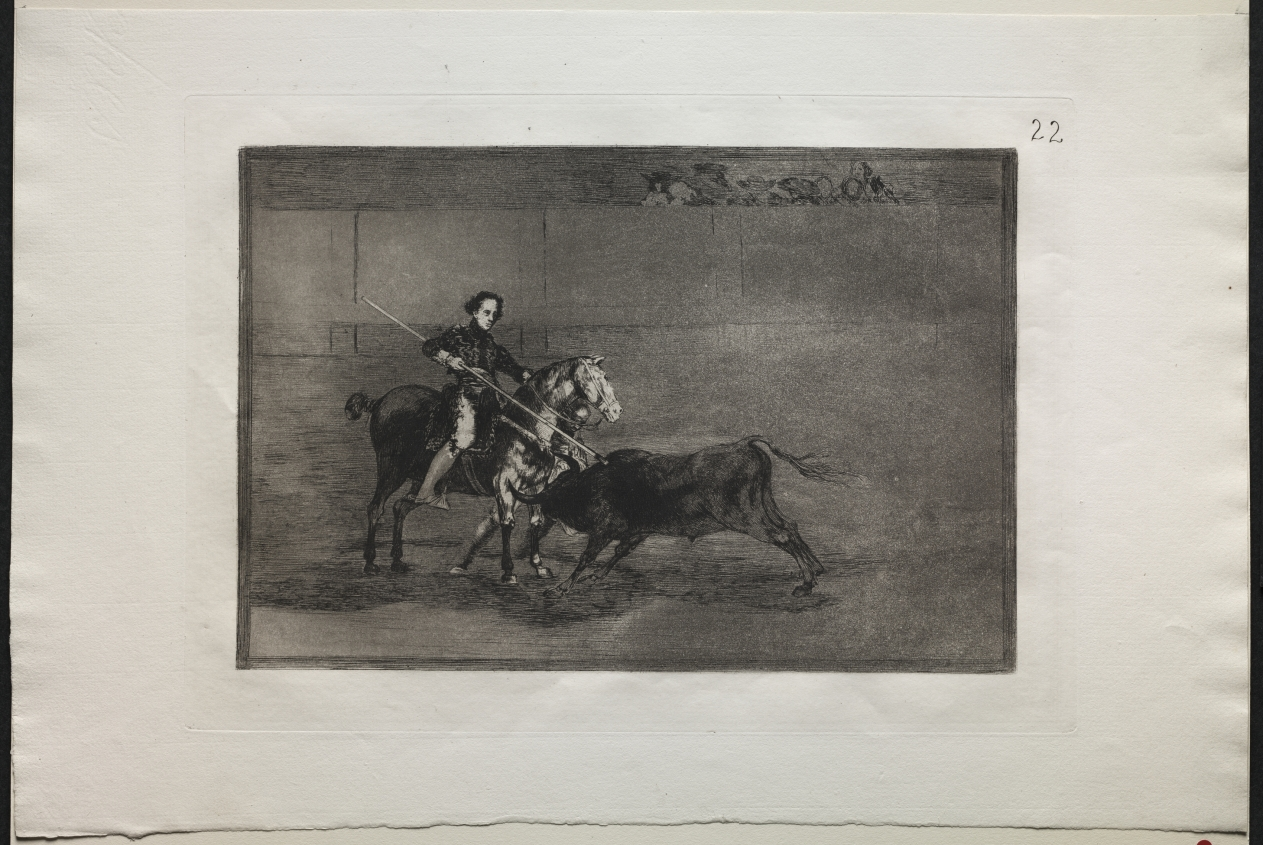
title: Bullfights: Manly Courage of the Celebrated Pajuelera in (the Ring) at Saragosa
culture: Spain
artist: Francisco de Goya (Spanish, 1746–1828)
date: 1816, printed 1876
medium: engraving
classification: Print